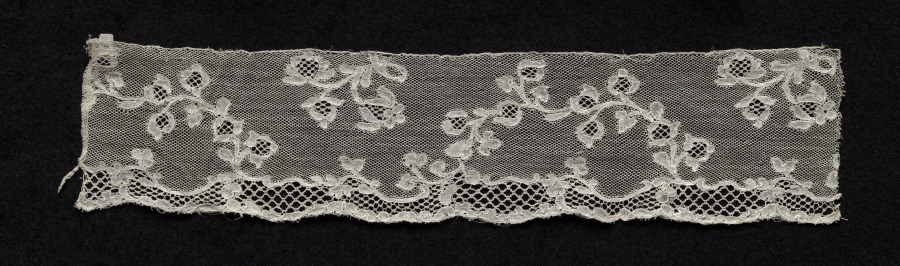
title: Lace Edging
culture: Belgium, Mechelen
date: 1840–60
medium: Bobbin lace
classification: Lace